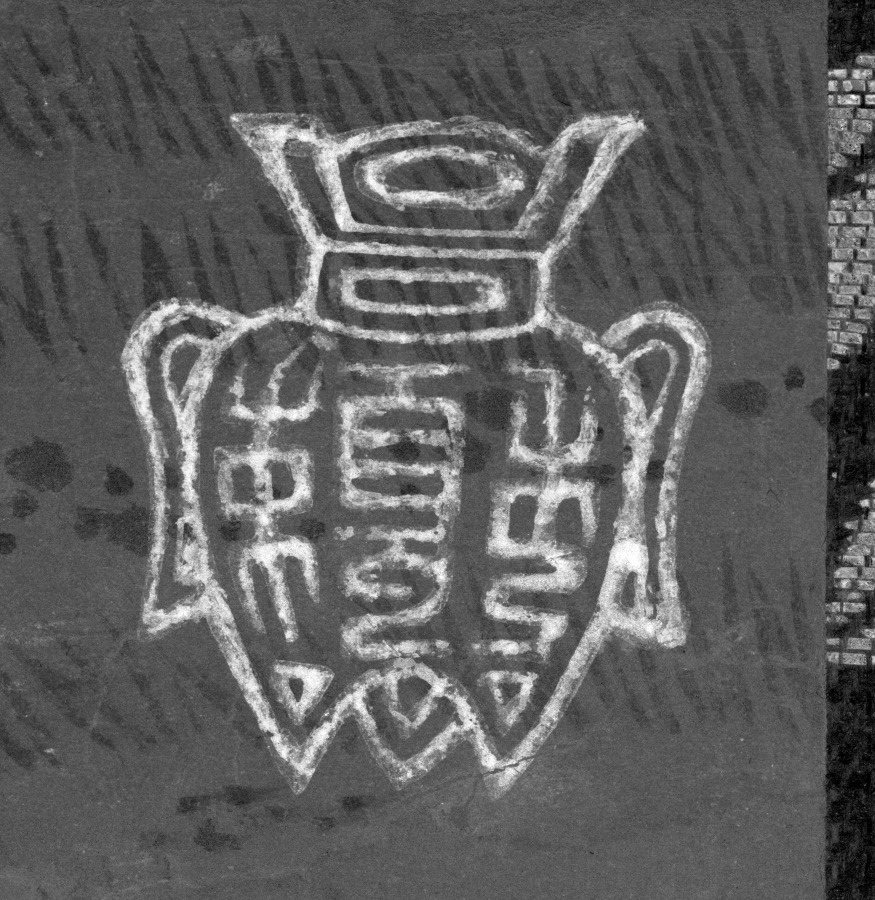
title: Farming and Herding Buffalo in Summer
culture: Japan, Muromachi period (1392–1573) to Momoyama period (1573–1615)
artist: Kano Hideyori (Japanese, active mid- to late 1500s)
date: mid- to late 1500s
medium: hanging scroll; ink and light color on paper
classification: Painting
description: Hideyori is most famous as the painter of a very early pair of genre screen paintings depicting people enjoying autumn foliage at a shrine-temple complex in Mount Takao near Kyoto. In this scene, people are hard at work farming their fields and herding water buffalo in summer. Such scenes were often associated with promoting the ideal of a prosperous realm, and also with the activities of the 12 months. Historical sources are divided on the biography of painter Kano Hideyori, but many scholars now believe he was the second son of Kano Motonobu, head of the Kyoto-based Kano family atelier.